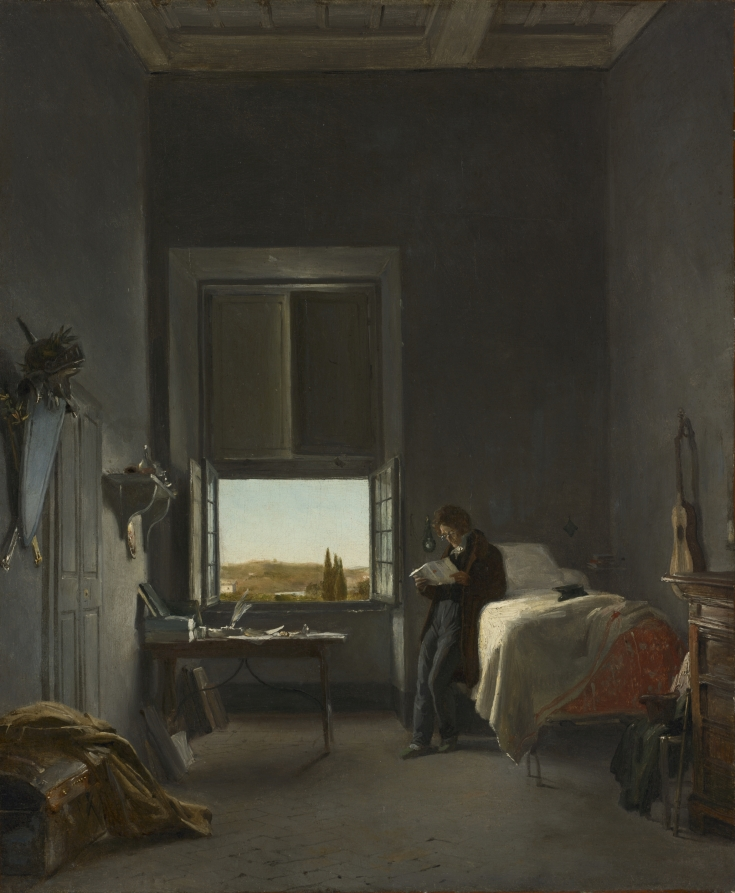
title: The Artist in His Room at the Villa Medici, Rome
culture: France, 19th century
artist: Léon Cogniet (French, 1794–1880)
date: 1817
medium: oil on canvas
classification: Painting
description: Léon Cogniet was one of many artists who traveled from across Europe to Rome during the early 19th century, drawing upon the city’s ancient past and its surrounding landscape for inspiration. In this formally composed scene, the artist stands within his studio, its walls bare and colorless in contrast to the dramatic light cast through his open window.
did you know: In 1817, Léon Cogniet won the Prix de Rome for history painting, allowing him to live and work in the city for five years. The helmet, shield, and swords seen at left refer to the expectation that Cogniet would produce a history painting each year to send back to Paris for review.